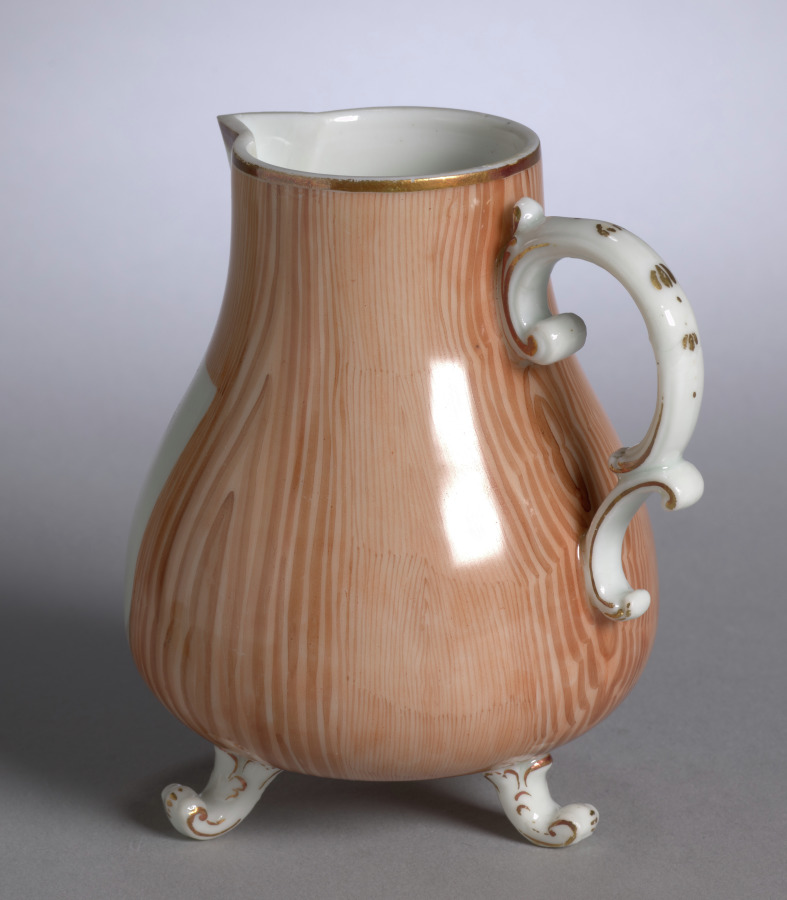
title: Covered Jug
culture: France, 18th century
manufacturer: Niderviller Factory (French)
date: c. 1780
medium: porcelain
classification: Ceramic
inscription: inscribed at lower right corner of trompe l'oeil print: Niderviller.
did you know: Cream jugs with lids or covers usually held warm cream for coffee or tea.